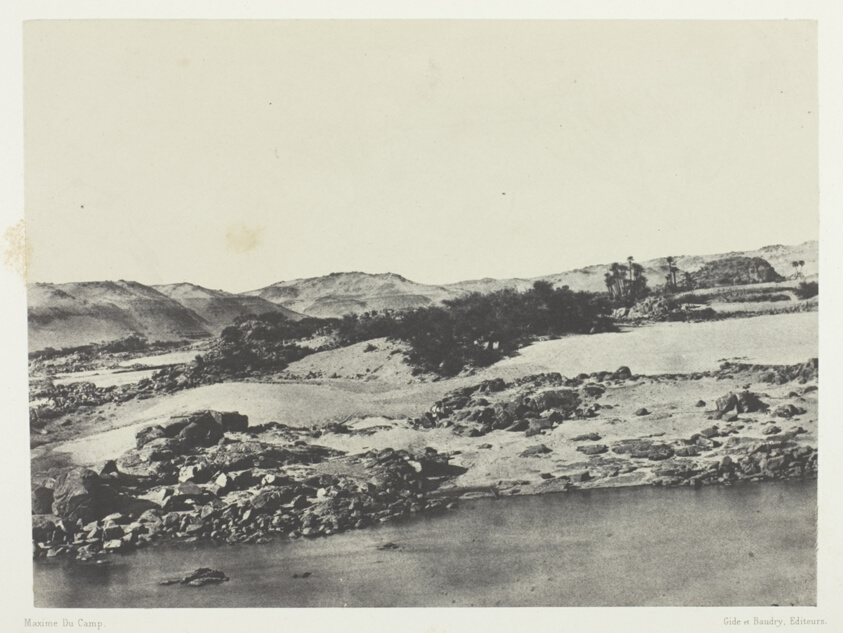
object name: Photograph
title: Entrée de la Première Cataracte, Haute-Egypte, plate 66 from the album "Egypte, Nubie, Palestine et Syrie" (1852)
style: 19th century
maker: Maxime Du Camp (French, 1822–1894)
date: 1849/51, printed 1852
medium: Salted paper print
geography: France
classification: salted paper print; photographic process; photography; photograph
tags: Collected by Hugh Edwards, Egypte, Nubie, Palestine et Syrie